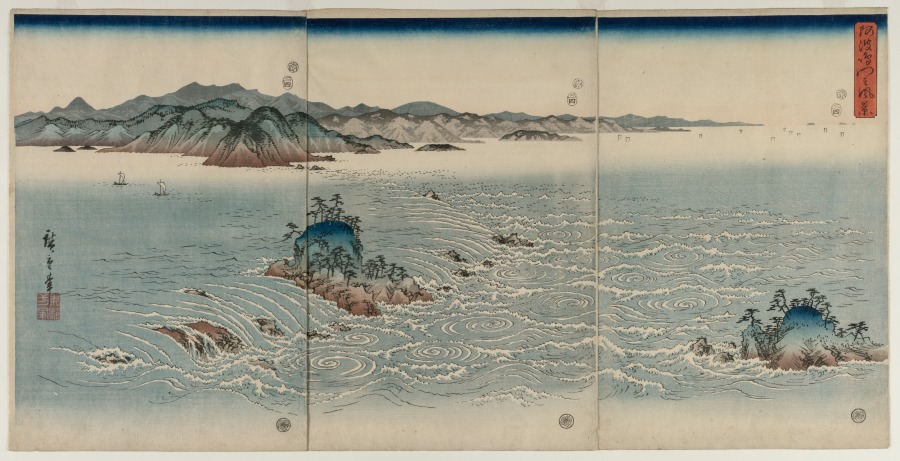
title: The Whirlpools of Awa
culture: Japan, Edo period (1615–1868)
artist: Utagawa Hiroshige (Japanese, 1797–1858)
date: 1857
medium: Triptych of color woodblock prints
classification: Print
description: Late in his career, Hiroshige explored the poetic theme of setsugekka, “snow, moon, and flowers,” in a set of three triptychs. The swirling whirlpools at Awa would remind the viewer of flowers.